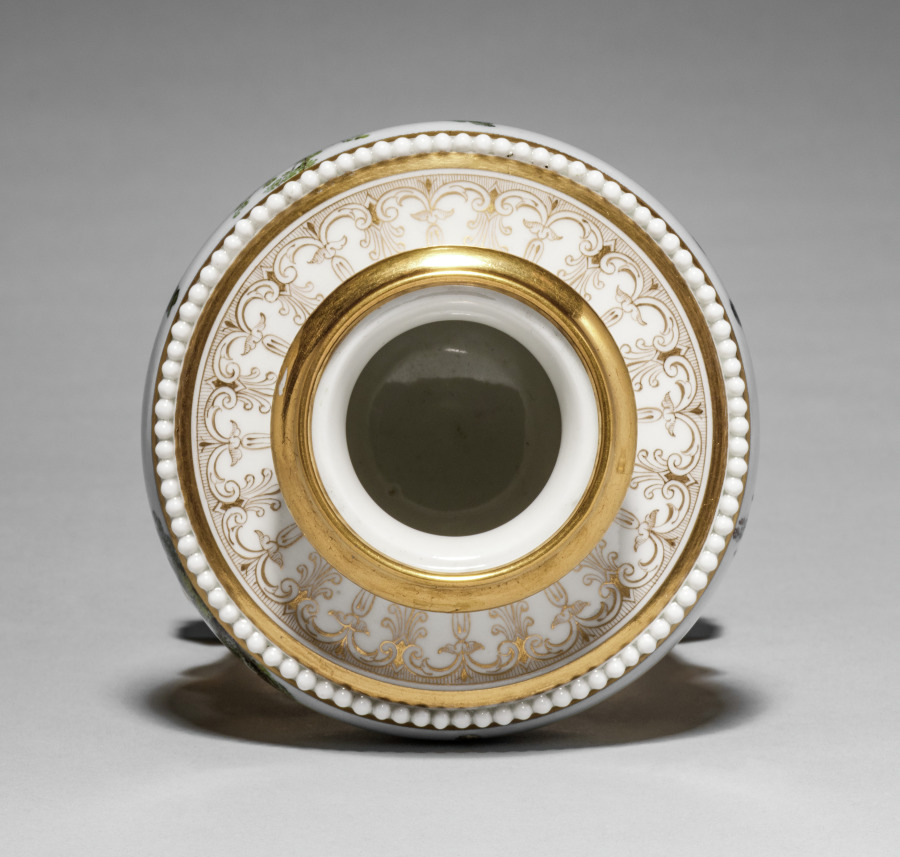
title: Urn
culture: England, Worcester, 19th century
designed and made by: Flight, Barr and Barr (British)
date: c. 1815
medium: artificial porcelain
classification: Ceramic